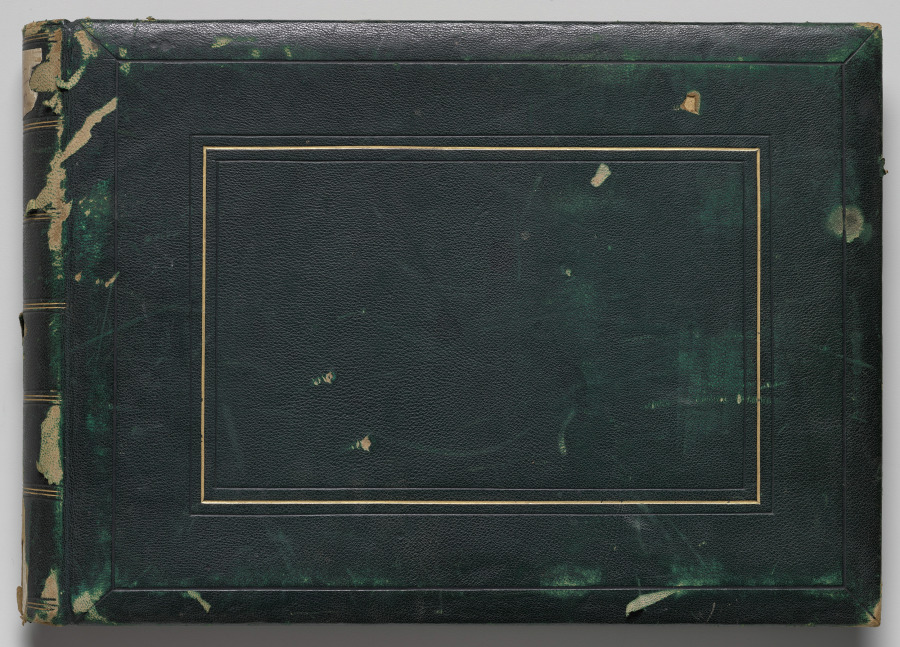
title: 46 Photographs from an Album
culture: India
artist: Raja Deen Dayal (Indian, 1844–1905)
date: c. 1882–87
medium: 46 albumen prints on 26 sheets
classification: Bound Volume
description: These photographs are part of an album, now disassembled, of around 105 photographs taken in India between 1885 and summer 1887 that provide glimpses into the lives of the British colonial elite and royal and upper-class Indians. The museum holds another group of 37 pictures from this album (2016.266), which was probably commissioned by a British civil servant visiting or working in India around 1888 as a personal souvenir of his experiences there.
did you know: Raja Deen Dayal is regarded now, and was considered during his lifetime, to be India’s most important 19th century photographer.